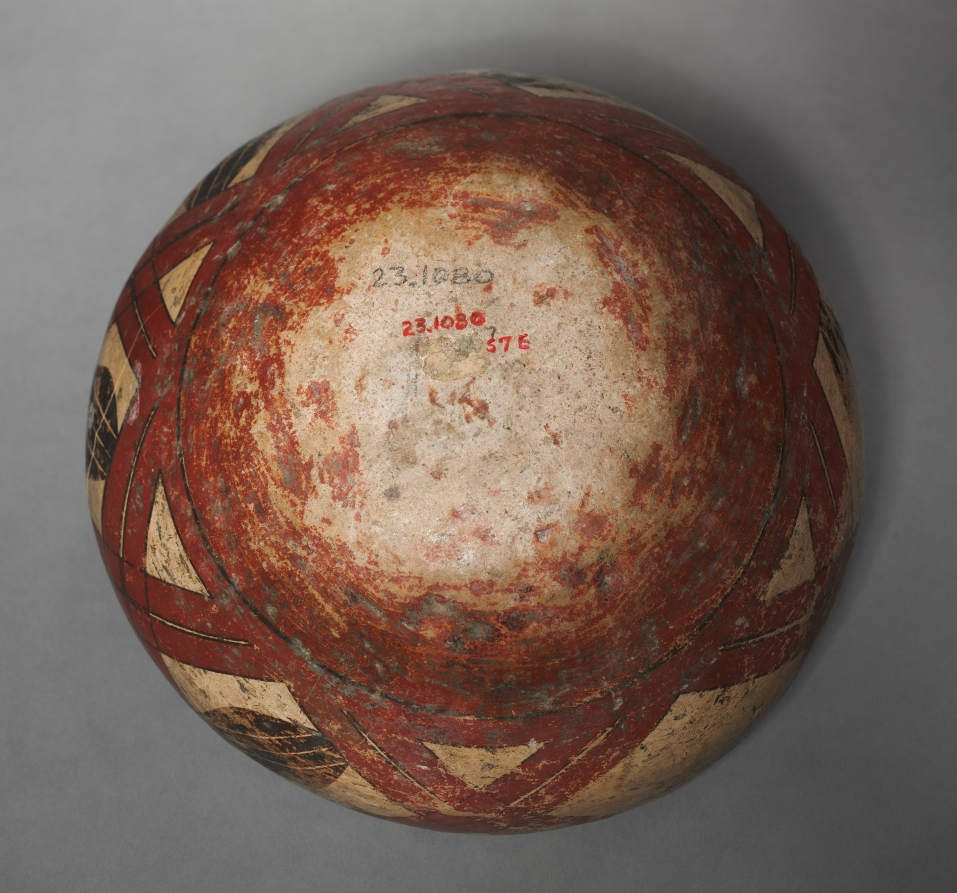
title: Stew Bowl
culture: Southwest,Pueblo, Acoma, Post-Contact Period, 20th century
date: 1860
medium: ceramic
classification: Ceramic